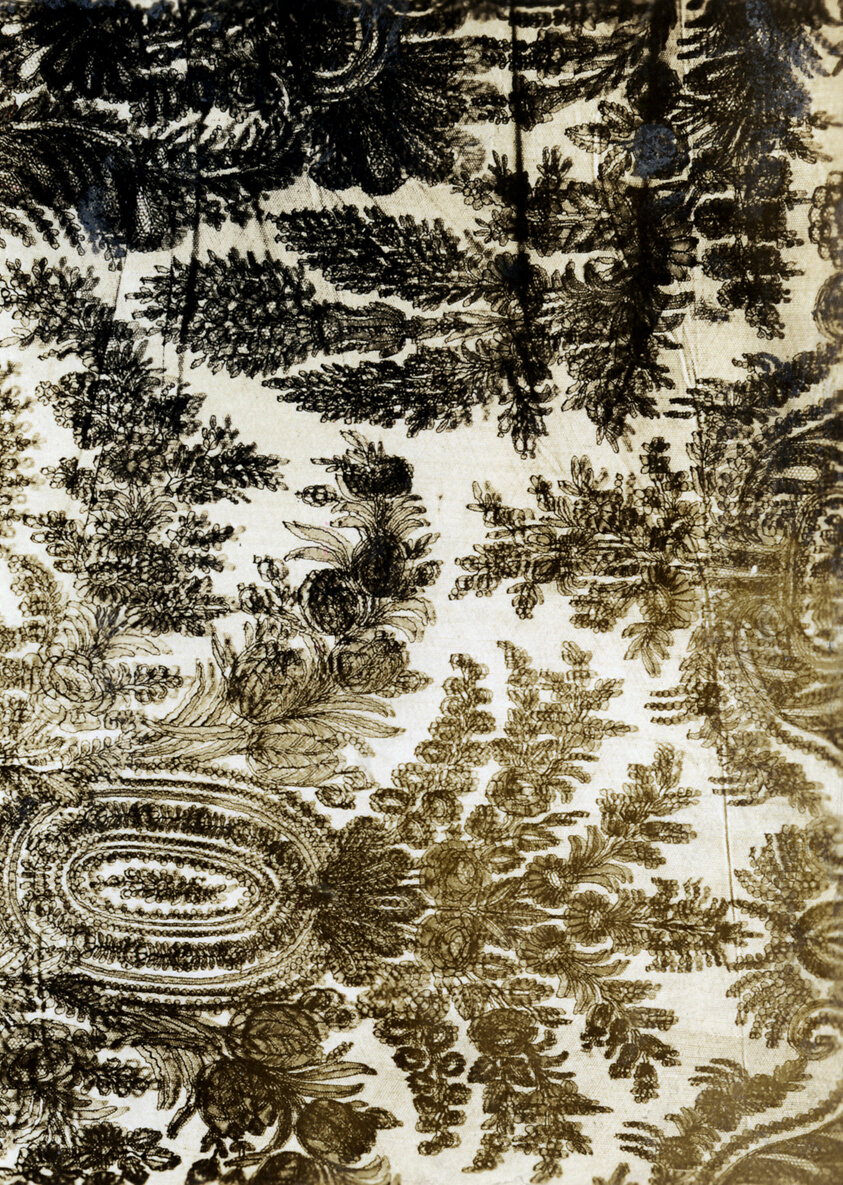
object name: Textile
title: Half Shawl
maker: Probably France, Bayeux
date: 1860s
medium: Silk, bobbin straight lace (made in vertical strips)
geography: Bayeux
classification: textile; lace - bobbin